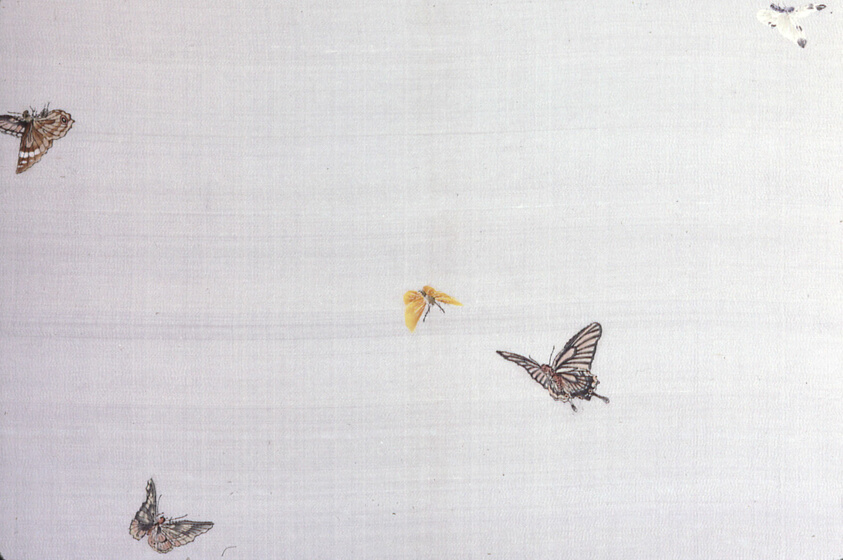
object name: Textile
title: Panel (Intended for a Kimono)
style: Japanism, meiji, late edo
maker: Japan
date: late Edo period (1789–1868)/ Meiji period (1868–1912), 19th century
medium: Silk, plain weave; painted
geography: Japan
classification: textile; weaving - printed